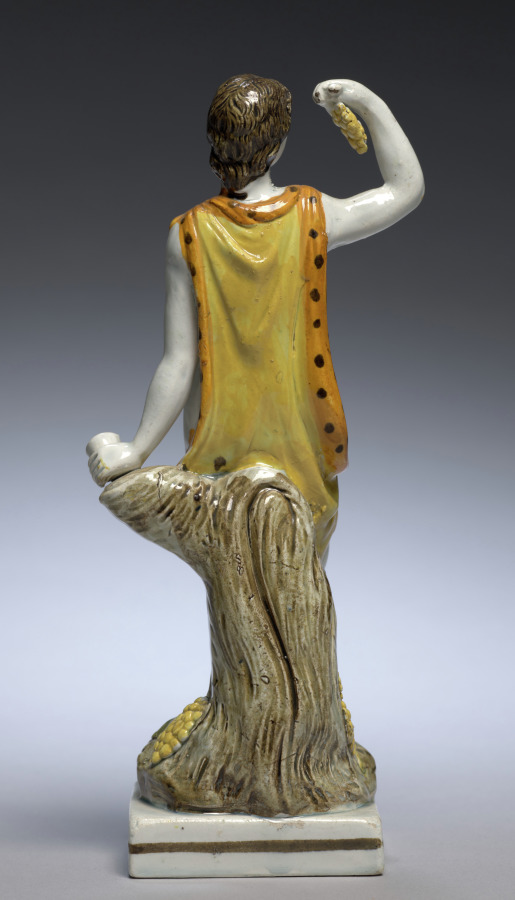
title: Bacchus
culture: England, Staffordshire, Pratt ware, late 18th-early 19th Century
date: c. 1800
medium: earthenware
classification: Ceramic